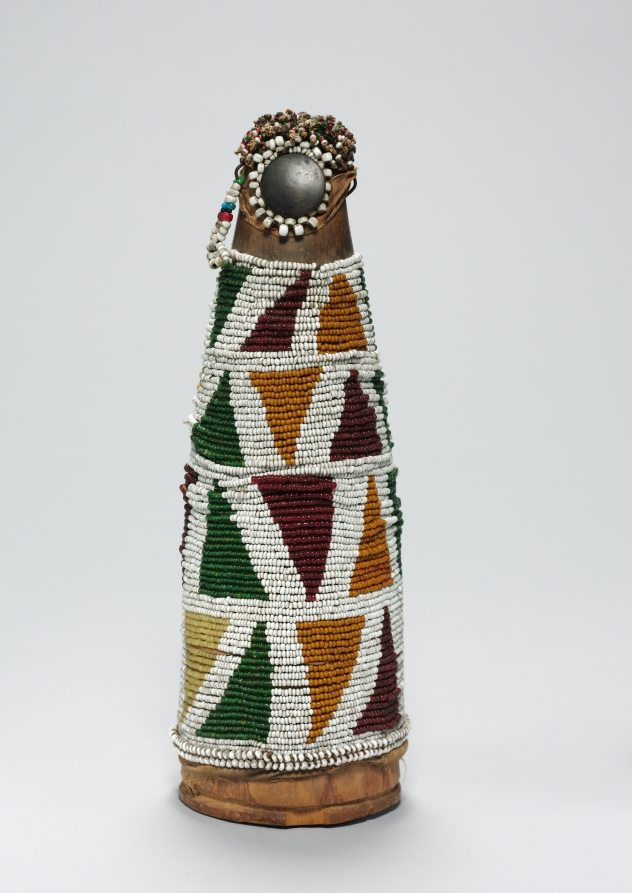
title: Figure (kgöngwana-tshingwana/Ngwana sehô)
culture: Southern Africa, Lesotho, Southern Sotho-style maker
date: 1800s–1900s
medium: Wood, glass beads, cloth, thread, and copper alloy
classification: Sculpture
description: Fertility figures like these were used during the initiation ceremonies of pubescent girls. Integrating talismanic materials in their fabrication, the figures were meant to guarantee fertility and prevent or cure barrenness—a gourd’s womblike shape and the seeds within symbolize fecundity. They are sometimes also called “child figures” because a young bride would care for them as she would for her future children, carrying them on her back and sleeping with them until her first child was born.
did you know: These figures were symbolic infants that recently married women would take care of until their first child was born.